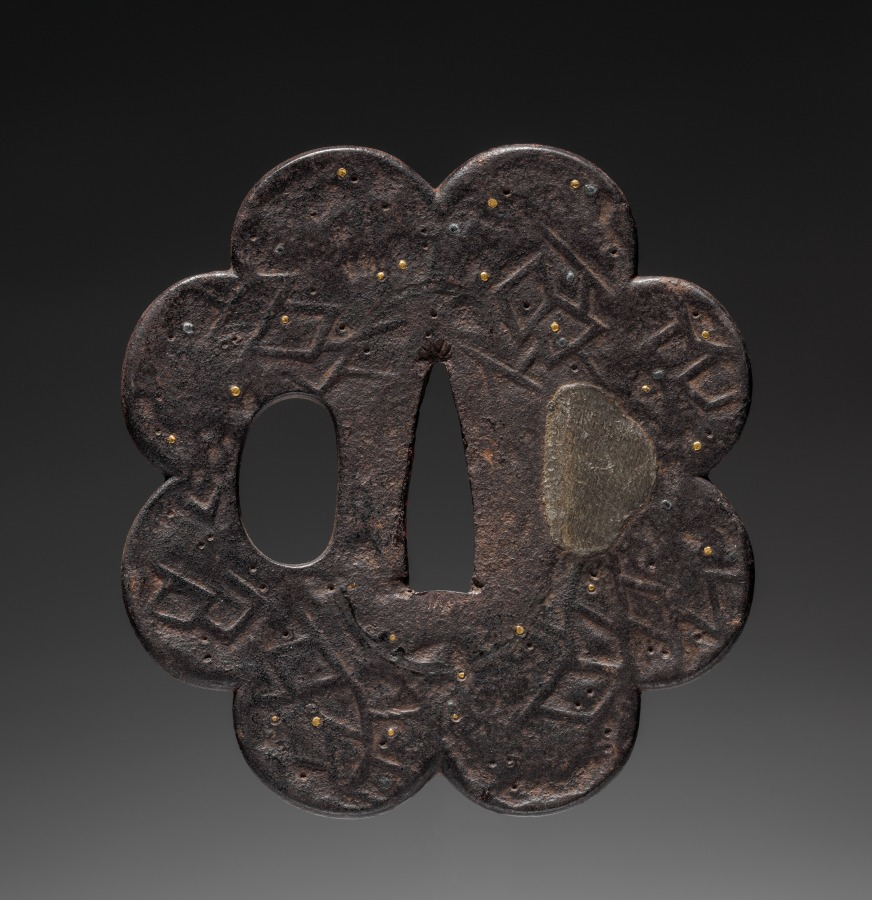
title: Sword Guard (Tsuba)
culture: Japan, possibly Edo period (1615-1868)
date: c. 1615–1868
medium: iron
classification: Arms and Armor